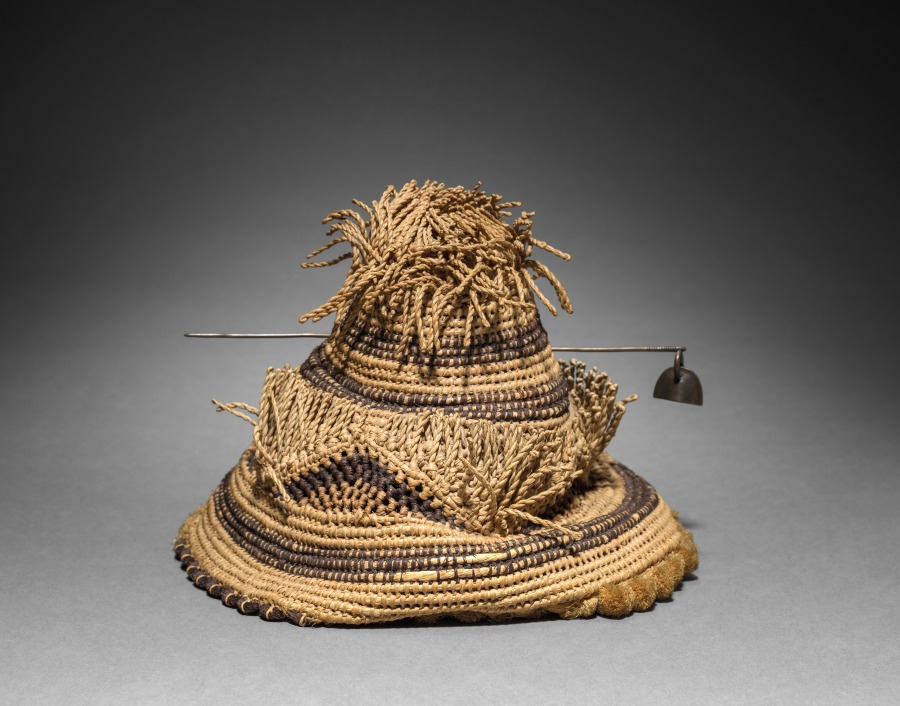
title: Hat (laket mishiing) with Pin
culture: Africa, Central Africa, Democratic Republic of Congo, early 20th century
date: early 1900s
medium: Raffia, metal, and dye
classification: Garment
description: Titled Kuba men and prominent women wear the laket, a small ornate dome-shaped hat. An essential fashion item of adult men in good social standing, it focuses special attention on the head as a significant marker of individual identity, ethnic affiliation, status, and role in society. This prestige object is secured on the crown of the head with a nine-and-a-half-inch metal pin that pierces through the hat onto a clump of hair. The laket is made from raffia palm fiber coiled into threads and woven in two alternating patterns and contrasting light and dark (dyed) wefts. There are two examples of the laket: the plain type with the flat top, and the more elaborate type called the laket mishiing.